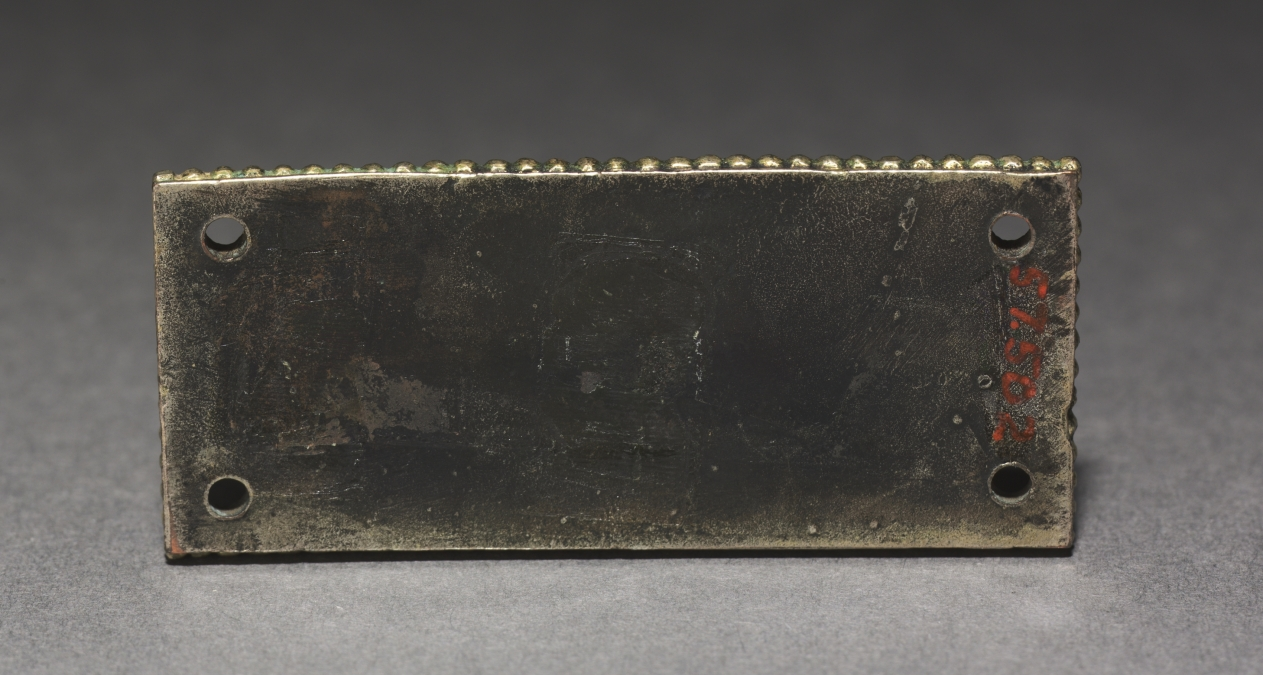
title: Plaque from a Reliquary Shrine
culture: Germany, Rhine Valley, Cologne, Romanesque period, 12th century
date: c. 1170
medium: gilded copper; champlevé and cloisonné enamel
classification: Enamel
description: These decorative enamel plaques (1953.274, 1953.638, 1957.502, and 1961.27) have been linked to some of Cologne's most important reliquary shrines, namely the shrine of the Three Kings at Cologne Cathedral and the shrines of Saints Maurinus and Albinus in the Benedictine abbey church of Saint Panteleon.